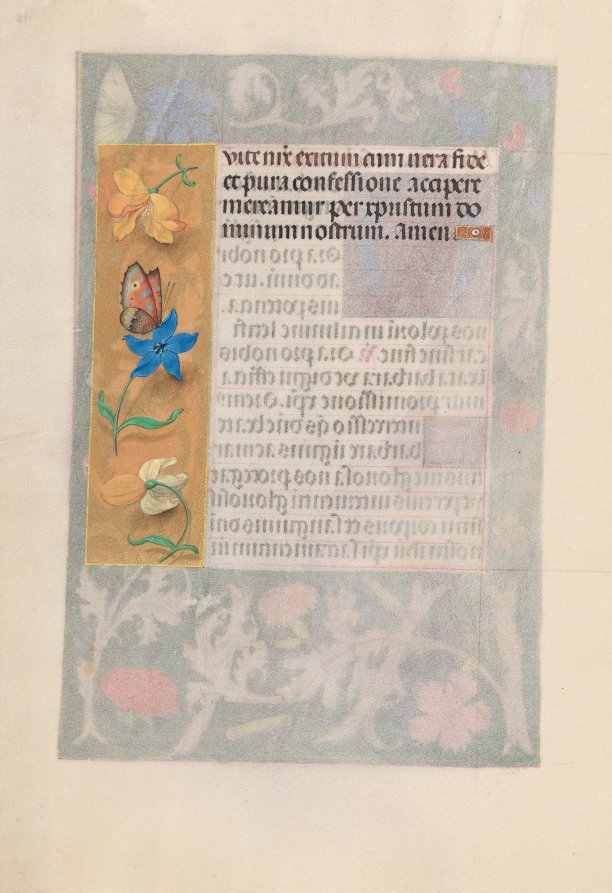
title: Hours of Queen Isabella the Catholic, Queen of Spain: Fol. 192v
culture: Flanders, Ghent and Bruges, late 15th century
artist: Master of the First Prayerbook of Maximillian (Flemish, c. 1444–1519)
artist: and Associates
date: c. 1500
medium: ink, tempera, and gold on vellum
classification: Bound Volume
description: This manuscript was illuminated by a circle of at least five highly organized manuscript painters active in the Flemish cities of Ghent and Bruges. The principal illuminator was Alexander Bening, who painted the majority of the book's miniatures. Manuscripts produced by this circle of artists are renowned for the decoration of their borders, which typically feature a rich variety of realistically-painted flowers, birds, and butterflies. This prayer book, called a book of hours, was intended not for a cleric, but for the private devotions of a lay person-in this case, Isabella the Catholic, Queen of Spain (1451-1504). Isabella's coat of arms embellishes the book's frontispiece. It is unlikely that the book was commissioned by the Queen herself; rather, she probably received it as a diplomatic gift from someone courting her patronage, perhaps Cardinal Francisco Jimenez de Cisneros. A Franciscan friar, Jimenez was dependent upon Isabella for his advancement, first to the post of Queen's confessor in 1492, and then to Archbishop of Toledo in 1495.